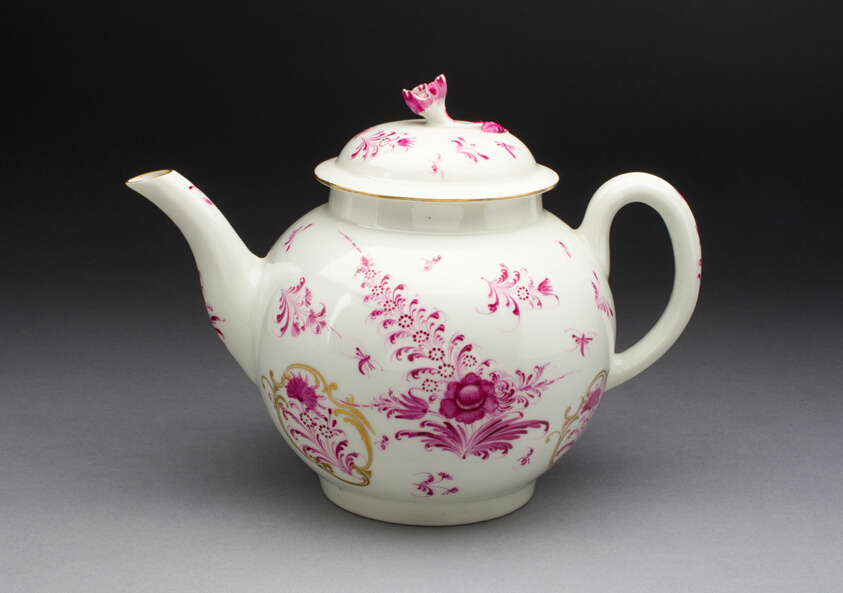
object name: Ceramics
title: Teapot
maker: Worcester Porcelain Factory (Warmstry House Period, 1751–1783); Worcester, England, founded 1751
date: c. 1770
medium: Soft-paste porcelain with purple enamel and gilding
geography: Worcester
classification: teapot; teaware; porcelain; european decorative arts; ceramics